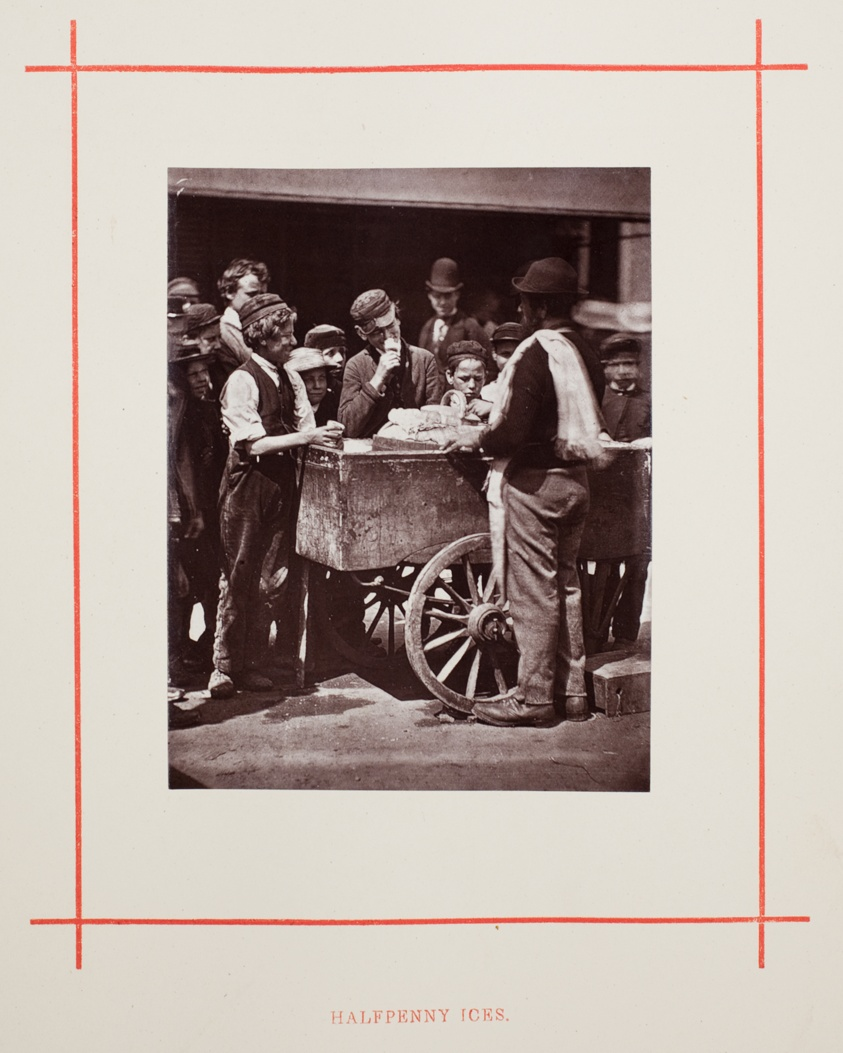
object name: Photograph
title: Halfpenny Ices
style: 19th century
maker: John Thomson (Scottish, 1837–1921)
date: 1877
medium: Woodburytype, from the album "Street Life in London"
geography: Scotland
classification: photograph; photography